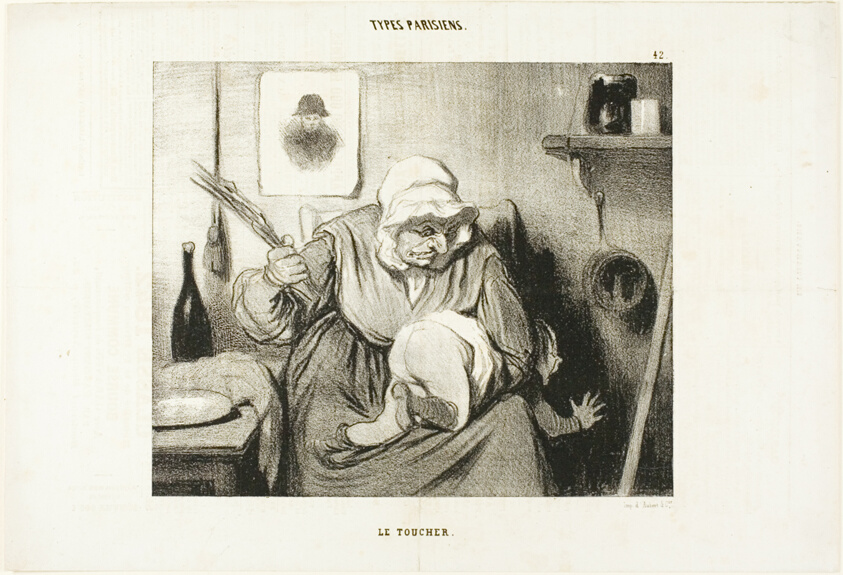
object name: Print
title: The Touch, plate 42 from Types Parisiens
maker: Honoré Victorin Daumier; French, 1808-1879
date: 1839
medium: Lithograph in black on white wove paper, with letterpress verso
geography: France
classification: lithograph; print; prints and drawing